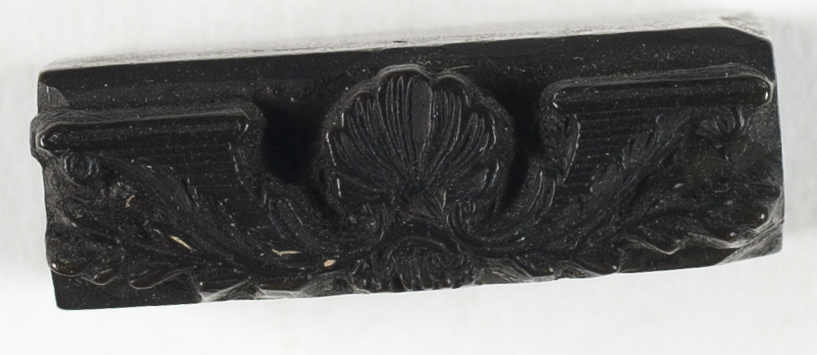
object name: Print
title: Woodblock for Shell and Shelf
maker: Thomas Bewick (English, 1753-1828)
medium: Wood engraving block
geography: England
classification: wood engraving block; matrix; print; prints and drawing; woodblock